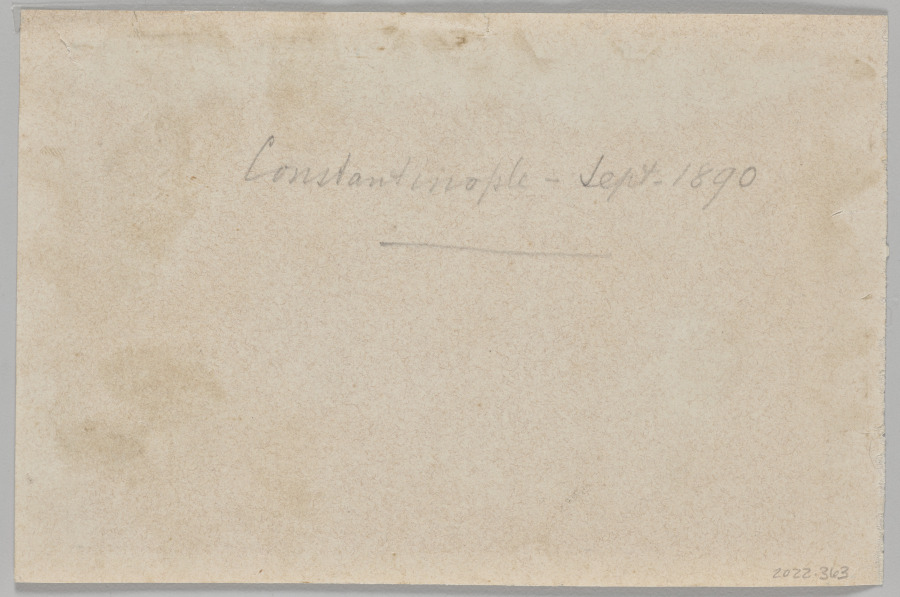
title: Untitled (reclining nude on carpet against painted backdrop of waves)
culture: Unknown, 19th century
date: 1870s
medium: albumen print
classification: Photograph